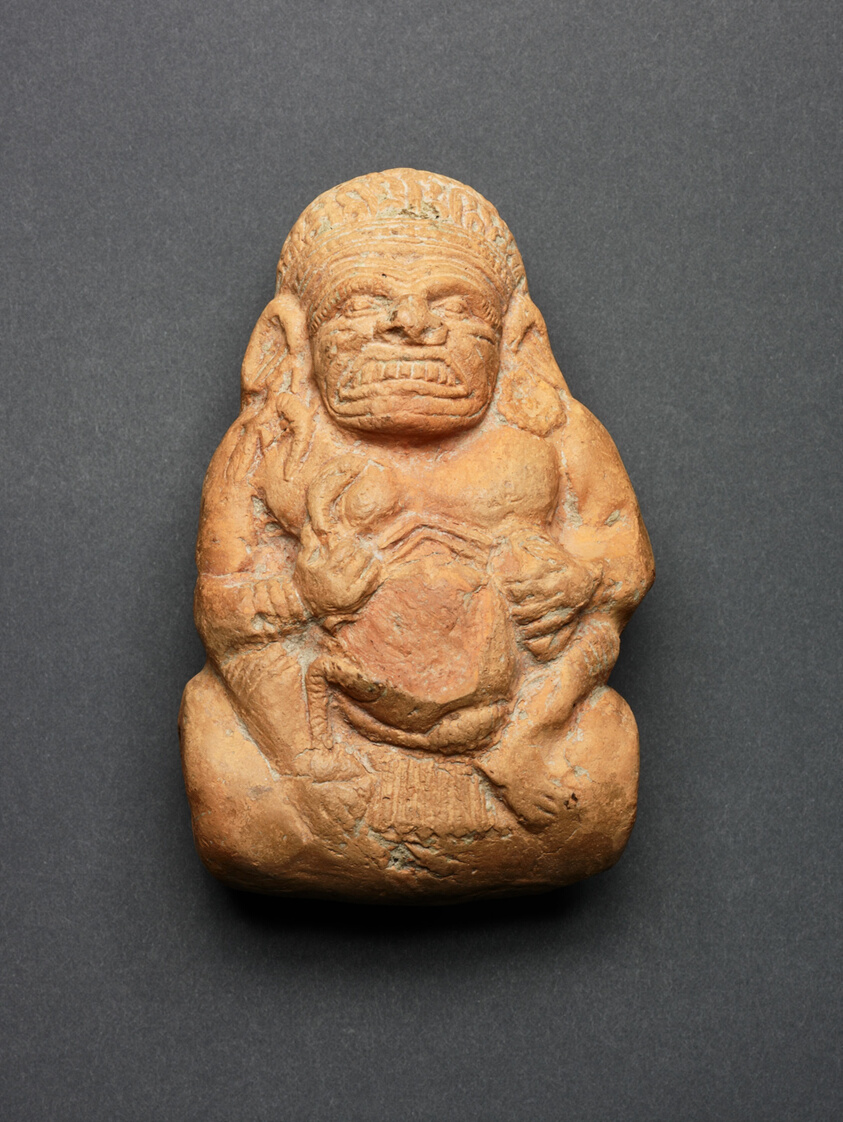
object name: Sculpture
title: Toy Cart with Grimacing Potbellied Dwarf (Yaksha)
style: South Asian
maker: India; West Bengal, Chandraketugarh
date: 1st century B.C.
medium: Terracotta with red slip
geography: West Bengal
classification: earthenware; ceramics; sculpture; asian art